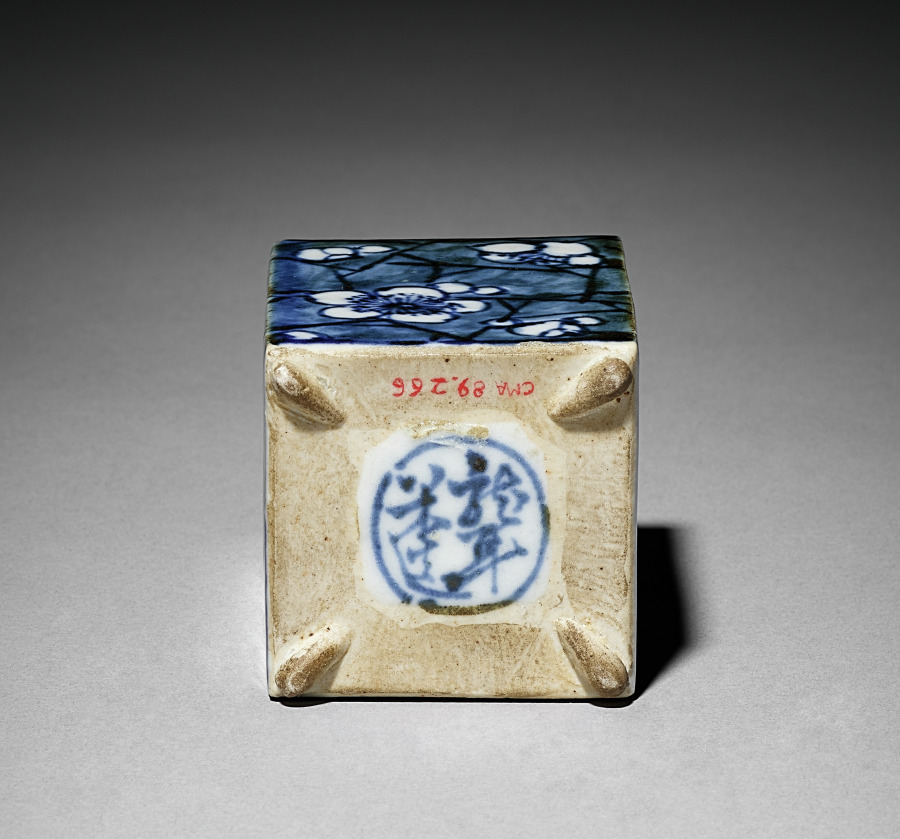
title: Tea Container with Plum Blossoms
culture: Japan, Edo period (1615–1868)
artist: Aoki Mokubei (Japanese, 1767–1833)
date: early 1800s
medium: porcelain with underglaze blue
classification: Ceramic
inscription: signed "Ro Mokubei" on base in underglaze blue.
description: Aoki Mokubei, born into a family of restaurateurs, was a potter, calligrapher, painter, and scholar, and is considered one of the three masters of later Edo period Kyoto ceramics. He specialized in porcelains fashioned after Chinese prototypes, and created works for steeped tea (sencha) such as these matching tea caddies decorated in an underglaze blue called sometsuke—literally “with applied dye.” He signed them on their bottoms. They also have intricately patterned silk sleeves to both beautify and protect them. On the exterior of the lid of the outer wooden box that contains them, it is written that Mokubei inscribed and painted an image on the box. On the interior of the lid, the signature and seals of a former owner are written. Mokubei has signed the lid of the inner box, and a charming ink and light color composition of West Lake in Hangzhou in China covers its three sides. On the fourth side is a long inscription by Mokubei describing the scene.